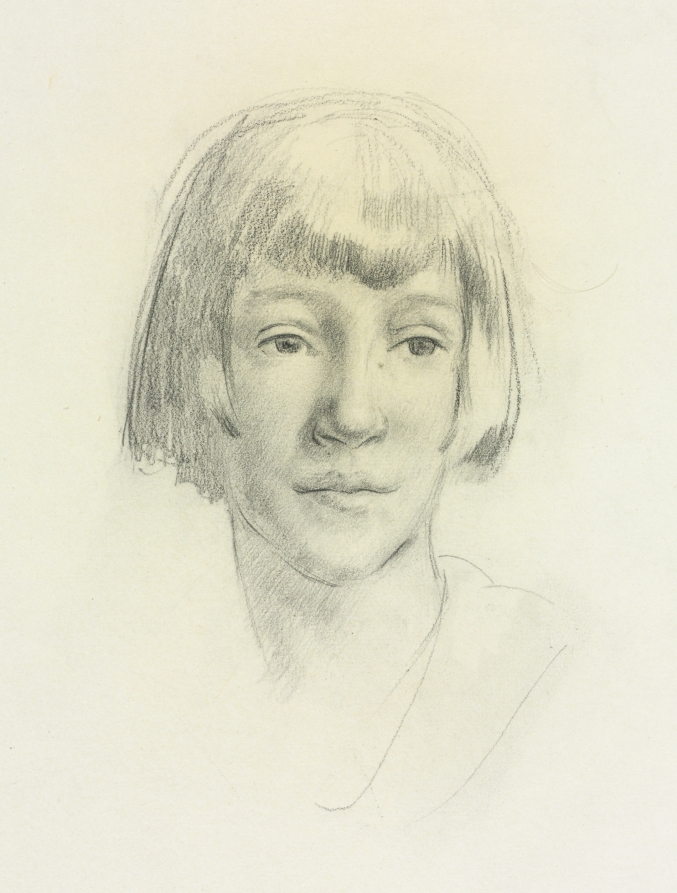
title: Youth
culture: America, Ohio, Cleveland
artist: Jean Ulen (American, 1900–1988)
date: 1920s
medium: pencil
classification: Drawing